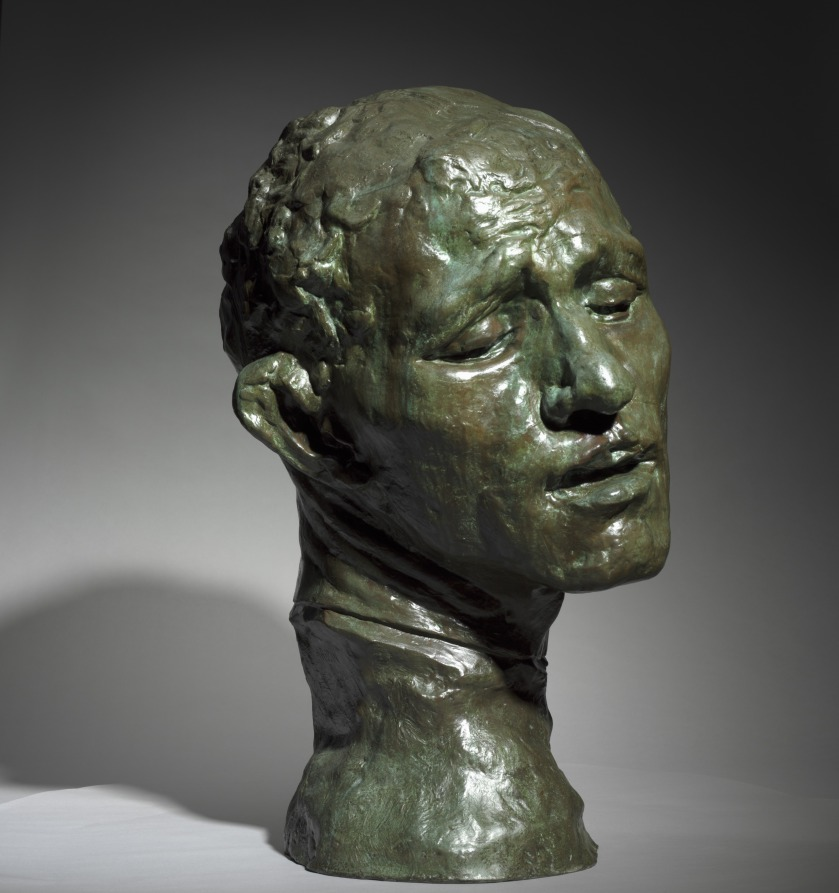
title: Heroic Head of Pierre de Wissant, One of the Burghers of Calais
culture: France, 19th century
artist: Auguste Rodin (French, 1840–1917)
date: 1886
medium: bronze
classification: Sculpture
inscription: inscribed at neck, left: A.Rodin; inscribed lower back: Alexis Rudier/Fondeur-Paris.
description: This sculpture depicts one of the figures in Rodin’s large public monument The Burghers of Calais (1884–89), featuring six French men who volunteered to be taken prisoner by the English in exchange for lifting the siege of Calais during the Hundred Years War (1337–1453). Pierre de Wissant’s anguished expression suggests extreme mental suffering as he contemplates his expected execution. Rodin exhibited a life-size version of the figure as an independent work before completing the monument. He later made multiple versions in various sizes and media.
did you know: This sculpture depicts the head of a figure from Rodin's large public monument The Burghers of Calais (1884-89). The CMA also owns a plaster version of the head.